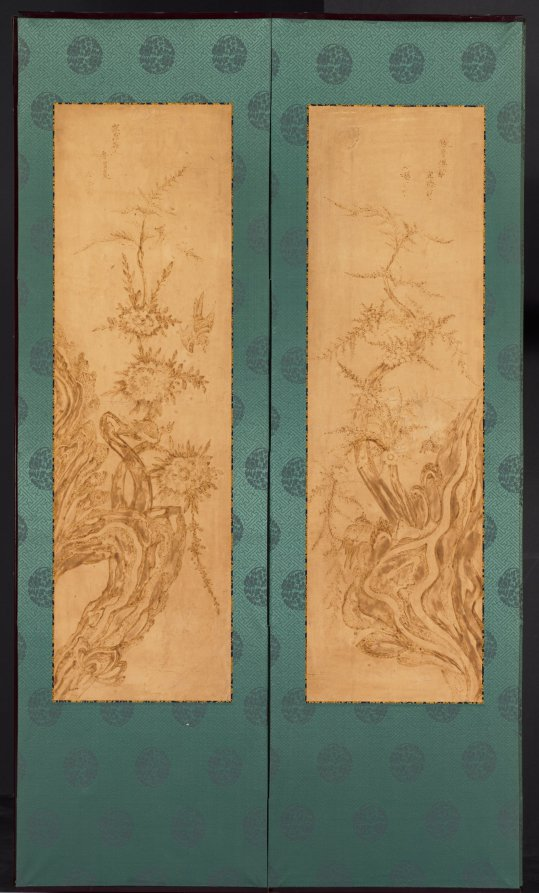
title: Birds and Flowers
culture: Korea, Joseon dynasty (1392–1910)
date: late 1800s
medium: Ten-panel folding screen with designs and inscriptions burnt into paper (pyrography)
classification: Painting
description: The image depicted on this folding screen is not executed in ink, but rather a method called “pyrography" or "nakhwa,” a technique of burning the surface of materials ranging from wood to paper with the delicately controlled application of a heated metal tool. This technique became widely popular in the 19th century. Scorched marks here replace brush strokes. Nakhwa method is now designated as a Korean Intangible Cultural Asset by the Korean government.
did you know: The painting is done by a pyrography method, a technique of burning the surface of materials with a heated tool.